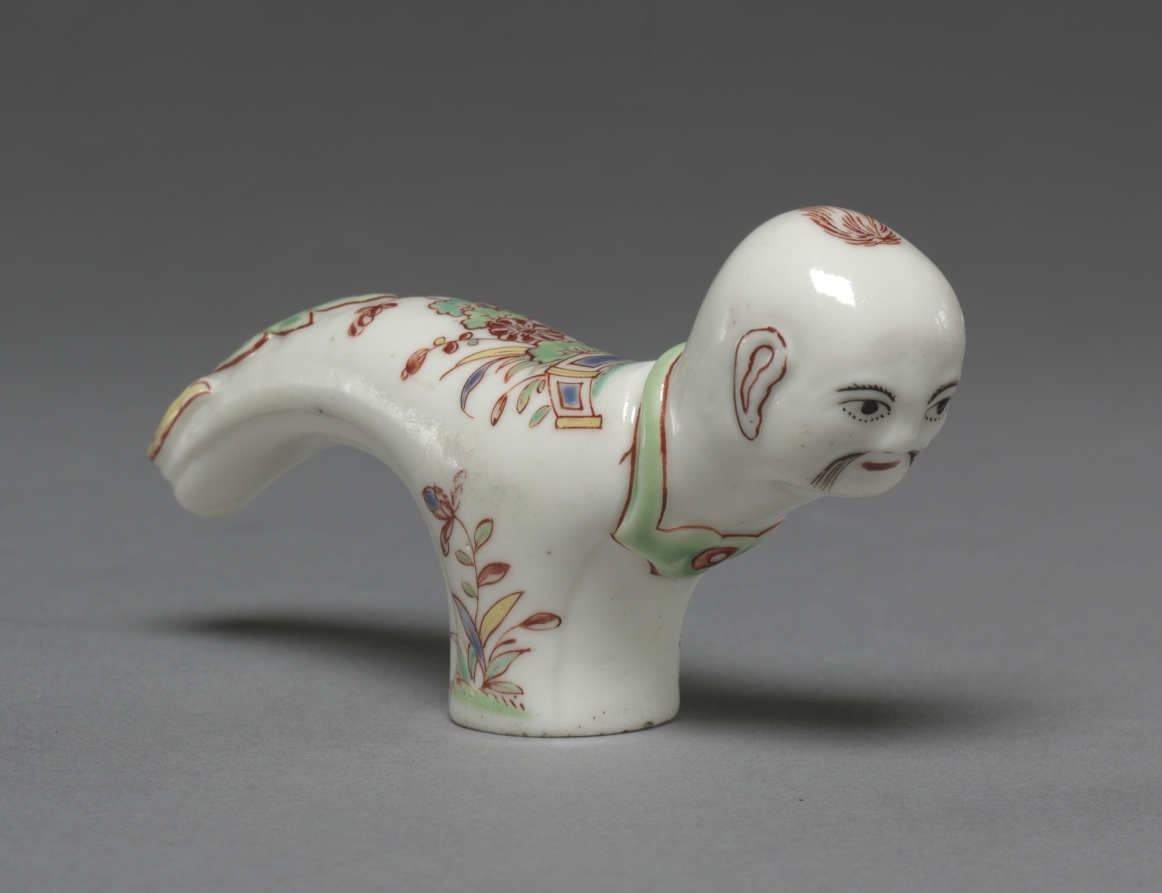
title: Cane Handle (Poignée de canne)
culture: France, Saint Cloud, 18th century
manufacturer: Saint Cloud Porcelain Factory (French)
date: c. 1745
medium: soft-paste porcelain with enamel decoration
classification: Ceramic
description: During the first half of the 18th century, porcelain cane handles were widely produced by the Saint-Cloud porcelain factory. This cane handle, molded in the shape of the head and torso of an Asian man, is representative of the popularity of chinoiserie, European designs that attempted to imitate the art, culture, and techniques of China and Japan.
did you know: The colorful overglaze enamel that decorates this cane handle was typical of Japanese Kakiemon decoration.